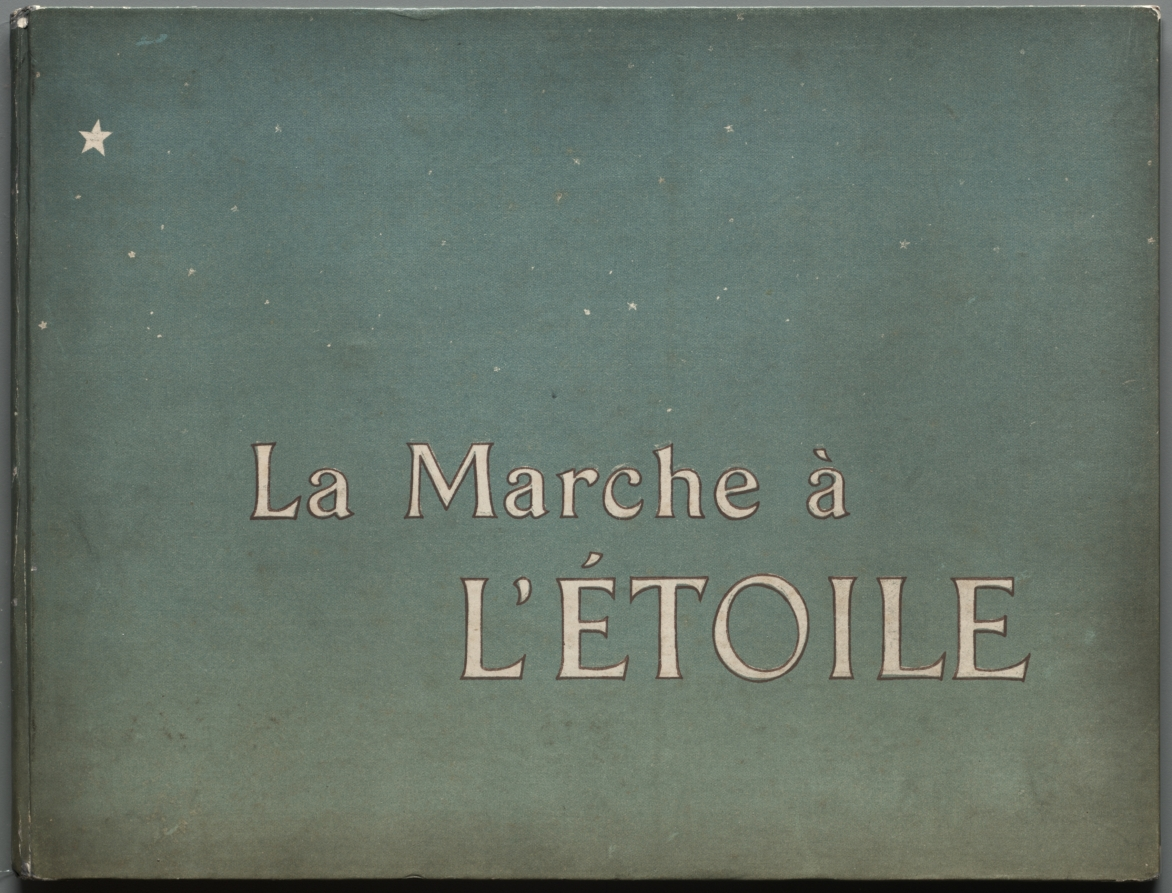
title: The Progress of the Stars: Cover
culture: France, 19th century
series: Bound Volume illustrating the poetry and music of Georges Fragerolle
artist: Henri Rivière (French, 1864–1951)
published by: C. Marpon & Flammarion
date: 1890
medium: 18 color lithographs in a Bound Volume illustrating the poetry and music of Georges Fragerolle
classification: Bound Volume